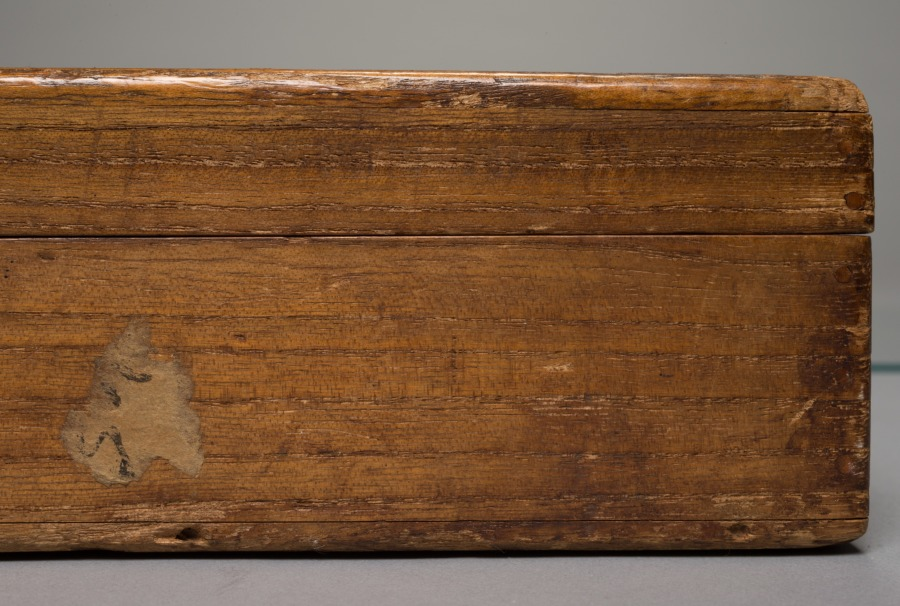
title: Bamboo in Rain; Bamboo in Wind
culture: Japan, Muromachi period (1392–1573)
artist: Genga (Japanese)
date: early 1500s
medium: hanging scroll; ink on silk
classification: Painting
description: East Asian paintings from China, Korea, and Japan were frequently conceived as sets of multiple images. These sets might have been composed for specific palace or temple rooms, or to portray a specific theme, such as the four seasons. Over time, the original intent of such sets is often lost through damage, changes in ownership, or a variety of other reasons. The identity of the artist can also be lost, but then, sometimes, retrieved. This pair of ink paintings has traditionally been labeled as Japanese and attributed to the 16th-century painter Genga. Since there are no seals or signature of the artist on the painting, this attribution was based on comparisons of brush style with paintings known to be by Genga. More recent study indicates that while the 16th century is an appropriate time frame for the pair, the precise cultural identity of the artist is not certain after all. The dark, eccentric shapes of the rocks and bamboo clusters and the dramatic tonal contrasts evident throughout the composition point to either Korean authorship or influence upon a Japanese painter of the period.